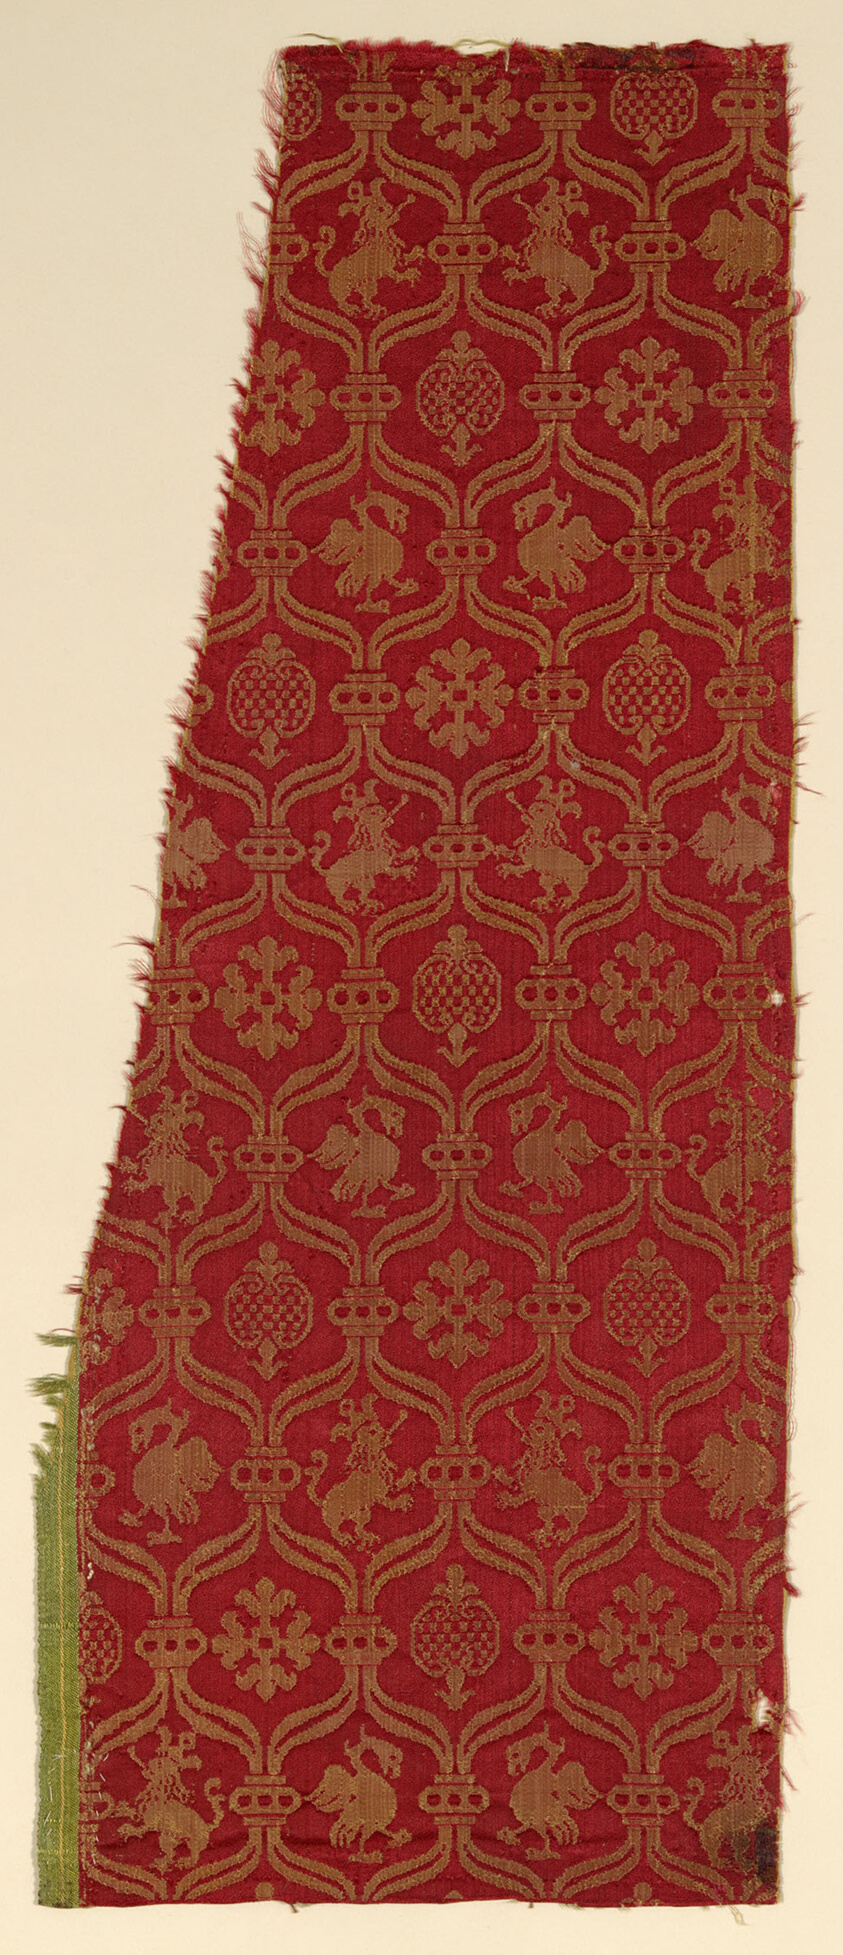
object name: Textile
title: Fragment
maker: Spain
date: 16th century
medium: Silk, satin damask weave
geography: Spain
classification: textile; weaving